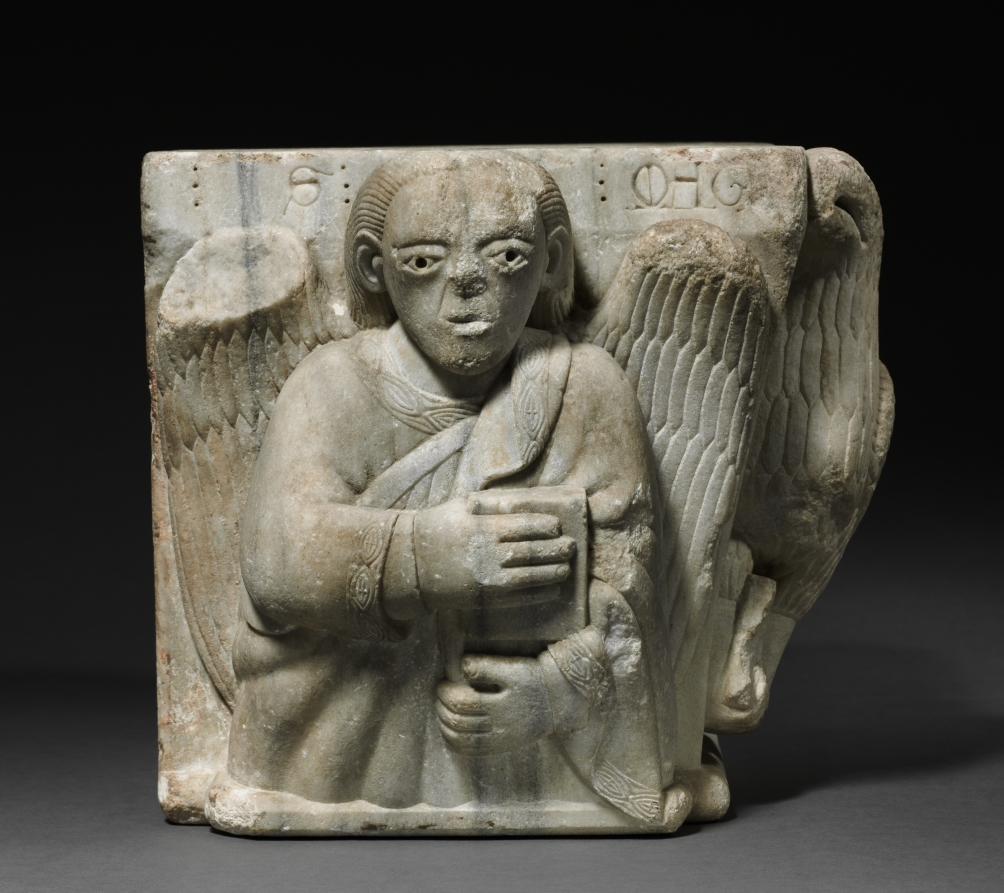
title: Engaged Capital with Figures of a Man and of an Eagle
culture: Northern Italy, Emilia (Bologna?), 12th century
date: 1175–1200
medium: marble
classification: Sculpture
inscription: face with half-figure of an angel with Gosepl bears the inscription: S. MAT; face with an eagle holding Gospel bears the inscription: S. IOHS. EVA.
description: These creatures, as indicated by their Latin inscriptions, are symbols personifying the Evangelists Matthew (man) and John (eagle). This iconography derives from the Book of Revelation.